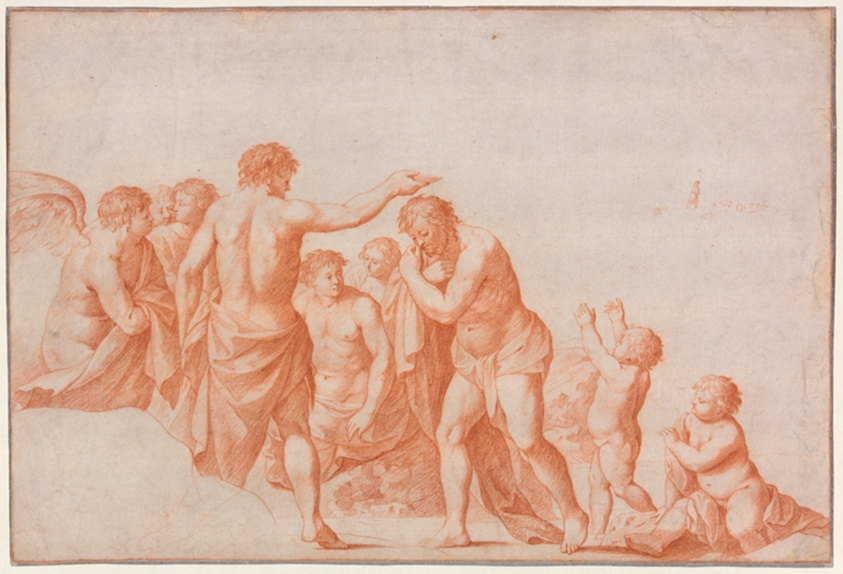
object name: Drawing and Watercolor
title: The Baptism of Christ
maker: Cornelis van Poelenburch; Dutch, 1594/95-1667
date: 1641/67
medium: Red chalk on cream laid paper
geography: Netherlands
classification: drawings (visual works); chalk; paper; prints and drawing